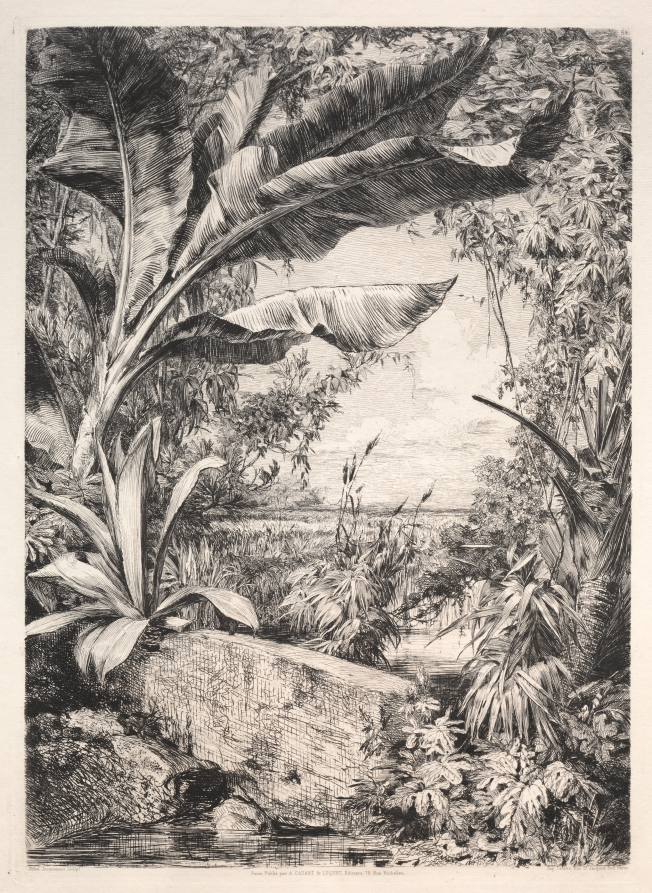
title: Plants of the Greenhouse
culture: France, 19th century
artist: Jules Jacquemart (French, 1837–1880)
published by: A. Cadart & Luquet, 79, rue Richelieu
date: 1872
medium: etching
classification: Print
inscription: in plate, lower right: "J. Jacquemart"